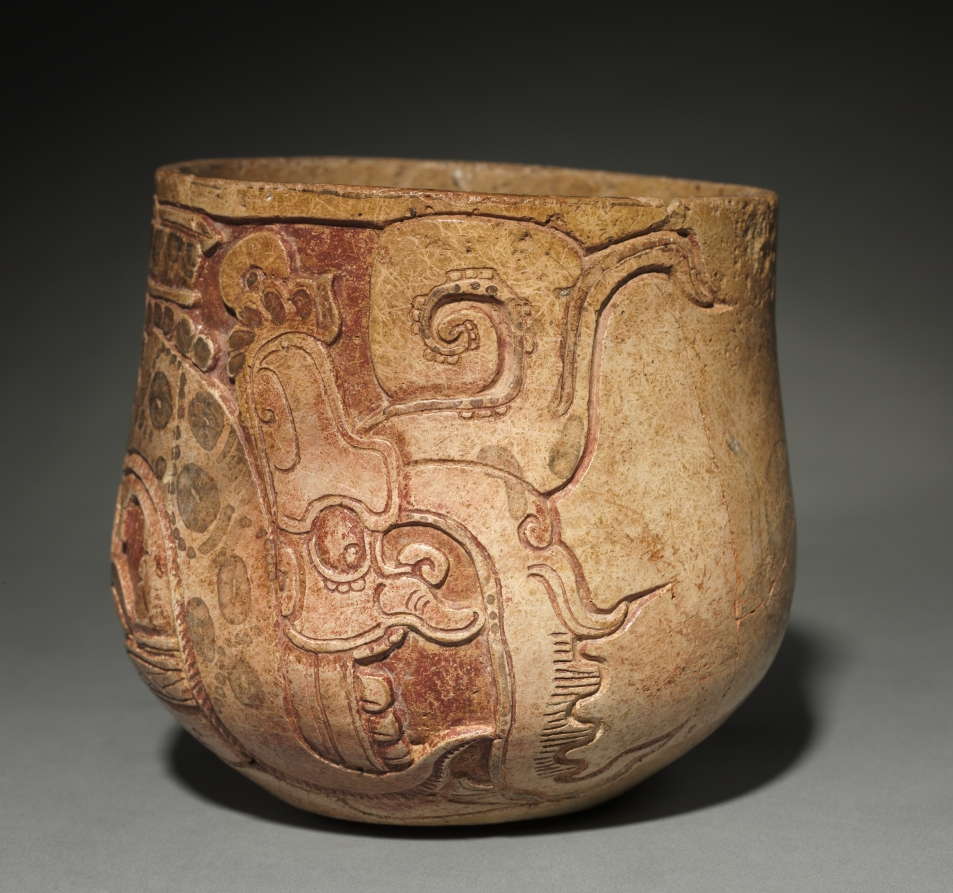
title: Carvel Vessel with an Underworld Diety (God L)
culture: Mexico, Yucatán Peninsula, Maya (Chocholá) style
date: 600–900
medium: earthenware, slip, pigment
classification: Ceramic